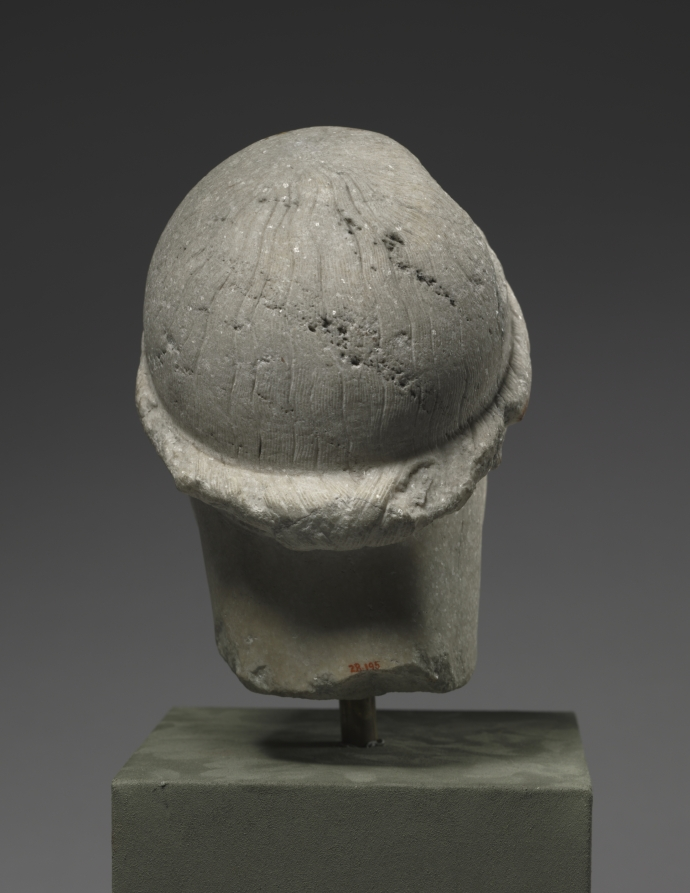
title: Head of Youth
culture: Sicily(?), Greek, Severe period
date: c. 470 BCE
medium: marble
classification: Sculpture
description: Although the face is now badly broken and quite weathered, this head was originally of high-quality workmanship, as can be seen in the extremely fine carving of the wavy hair preserved at the top and back. The slight asymmetry of the neck and facial features suggest that the head, which likely belonged to a full-bodied sculpture just under life-size, turned gently to one side.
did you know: The Severe style, named for its sober simplicity, marks the beginning of the Greek Classical period, c. 480–450 BC.